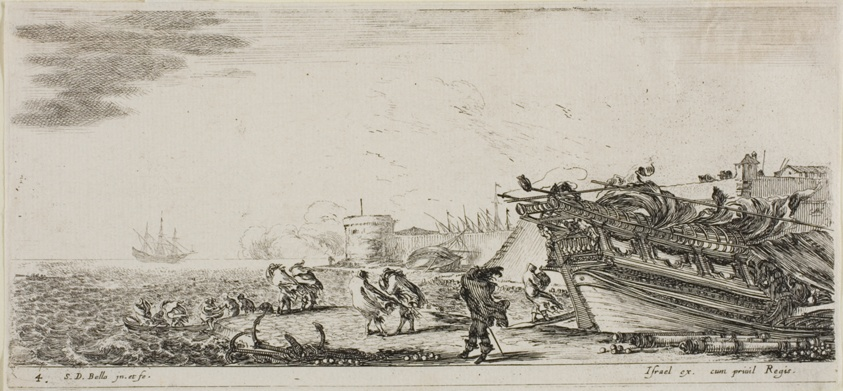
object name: Print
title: Plate Four from Various Embarkments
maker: Stefano della Bella (Italian, 1610-1664)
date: c. 1640/50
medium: Etching on ivory laid paper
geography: Italy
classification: etching; paper; print; prints and drawing